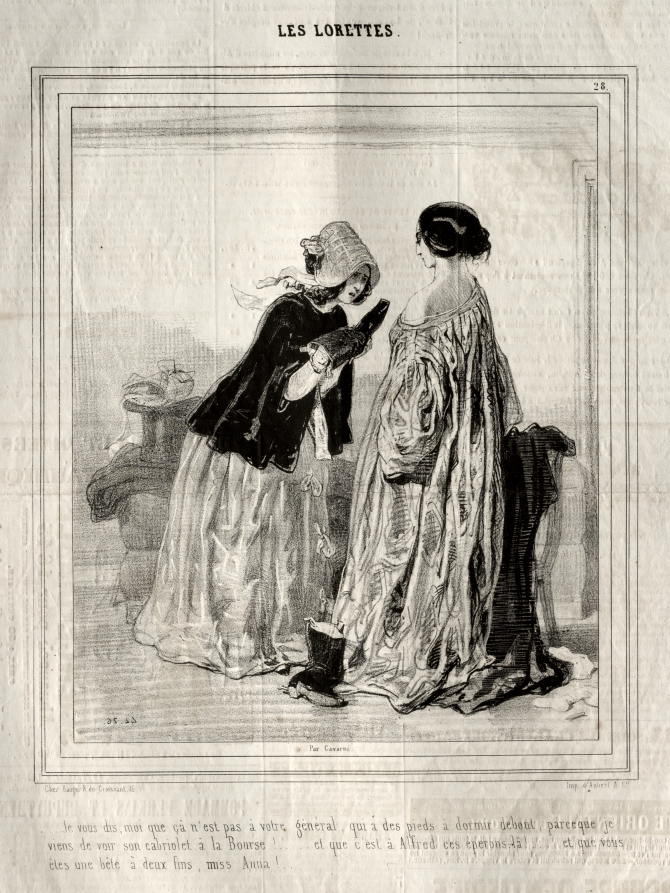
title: Les Lorettes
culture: France, 19th century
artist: Paul Gavarni (French, 1804–1866)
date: 1842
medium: lithograph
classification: Print